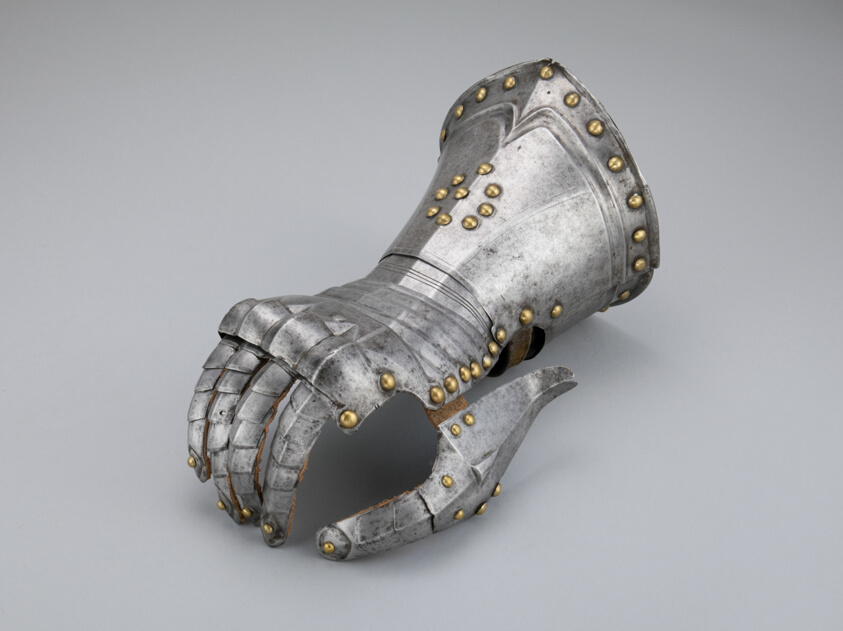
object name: Armor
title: Fingered Gauntlet for the Right Hand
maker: Southern German, Nuremberg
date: c. 1600/20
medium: Steel, brass, and leather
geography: Nuremberg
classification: suit-gauntlet; armor; arms and armor